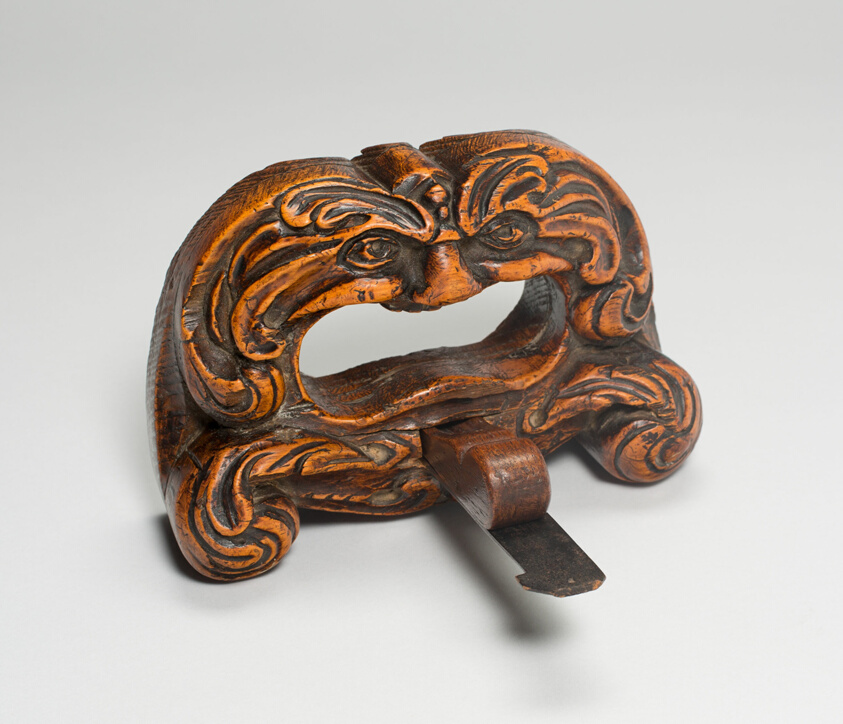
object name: Metalwork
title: Croze Plane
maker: Possibly France or Germany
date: 17th century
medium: Hardwood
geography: France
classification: tool; european decorative arts; metalwork